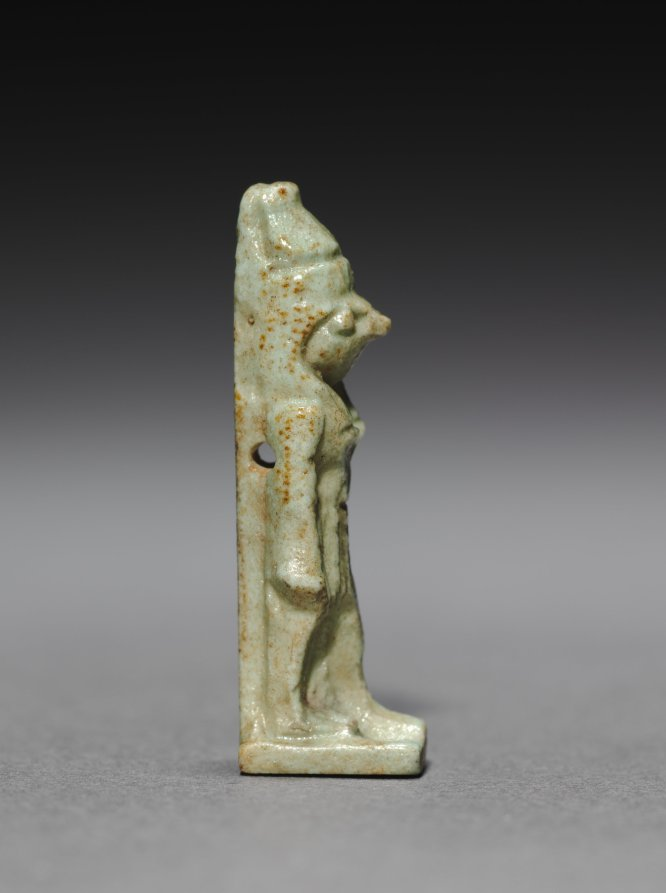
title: Amulet of Horus (?)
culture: Egypt, Late period (715–332 BCE), Dynasty 30–Greco-Roman period (332 BCE–395 CE), Ptolemaic dynasty (305–30 BCE)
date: 380–30 BCE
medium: gray green faience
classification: Amulets